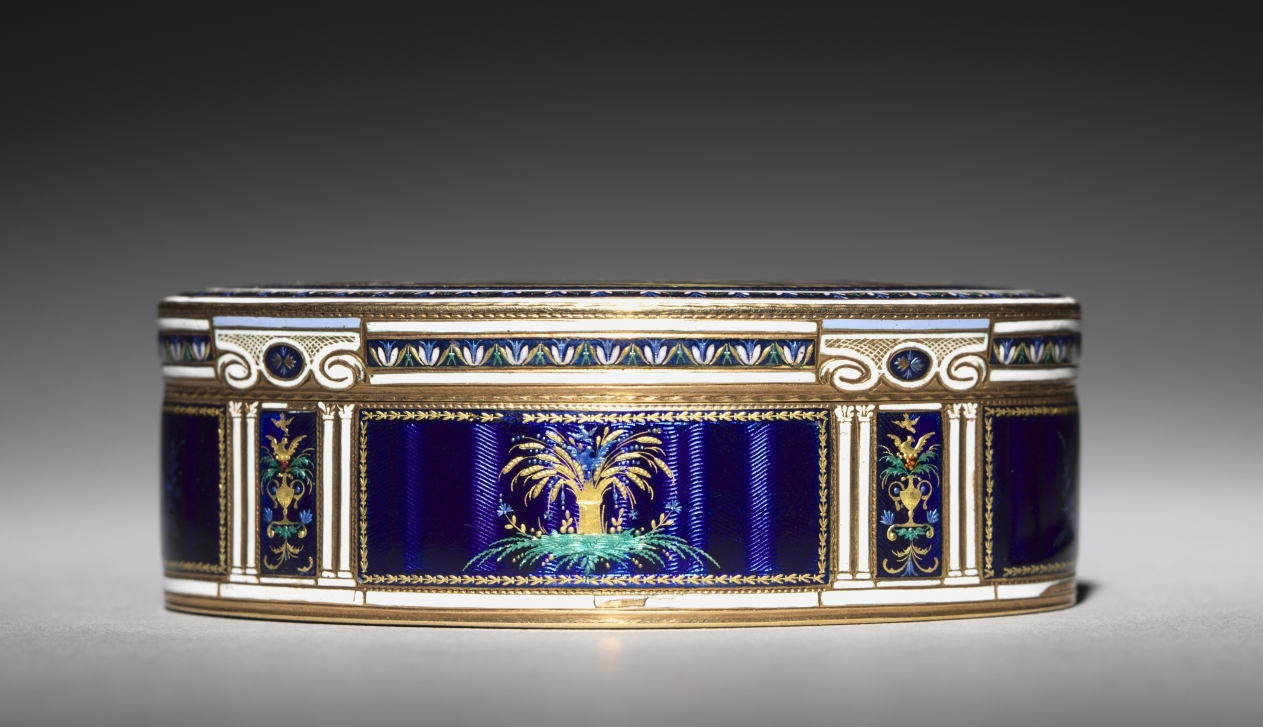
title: Box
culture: Switzerland, Geneva, late 18th Century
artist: Georges Rémond et Cie (Swiss)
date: late 1700s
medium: gold and enamel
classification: Enamel